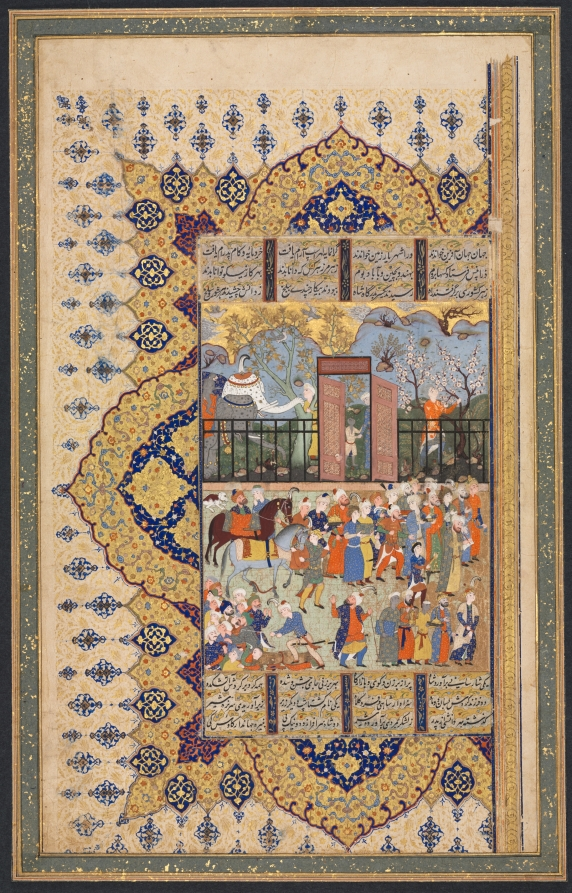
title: King Luhrasp Ascends the Throne: a Processon Arrives at Court, recto of the left folio of a double-page composition from a Shahnama (Book of Kings) of Firdausi (940-1019 or 1025)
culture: Iran, Shiraz, Safavid period (1501-1722)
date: c. 1560–90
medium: opaque watercolor, ink, and gold on paper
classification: Manuscript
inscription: Script: Nasta'liq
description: This scene of a procession arriving at court was surely completed by the court scene itself. The subject of the frontispiece had nothing to do with the text that it accompanied, and the text has not been identified.